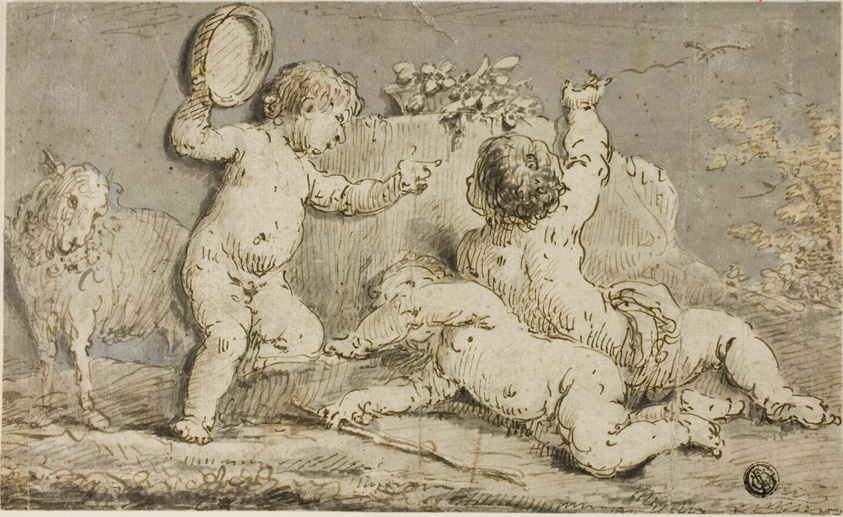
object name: Drawing and Watercolor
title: Three Cherubs Playing around a Rock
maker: Follower of or after Jacob de Wit; Dutch, 1695-1754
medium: Pen and brown ink with brush and gray wash, on ivory wove paper, cut out and laid down on ivory laid paper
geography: Holland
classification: pen and ink drawings; drawings (visual works); prints and drawing